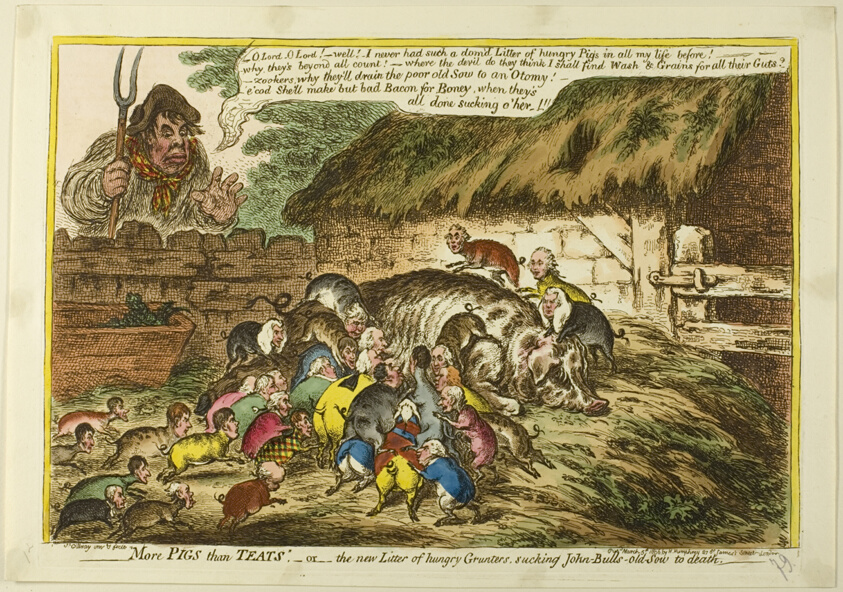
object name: Print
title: More Pigs Than Teats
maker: James Gillray (English, 1756-1815); published by Hannah Humphrey (English, c. 1745-1818)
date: published March 5, 1806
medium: Hand-colored etching on paper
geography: England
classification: etching; print; prints and drawing